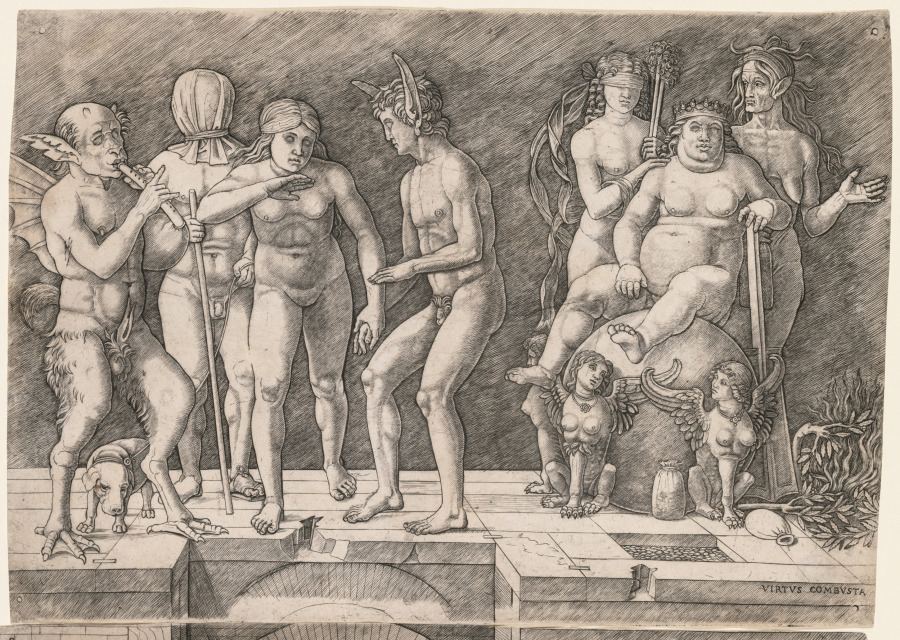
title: Allegory of the Fall of Ignorant Humanity: Virtus Combusta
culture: Italy, late 15th-early 16th century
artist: Giovanni Antonio da Brescia (Italian)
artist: after Andrea Mantegna (Italian, about 1431–1506)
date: c. 1500–1505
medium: engraving printed on two sheets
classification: Print